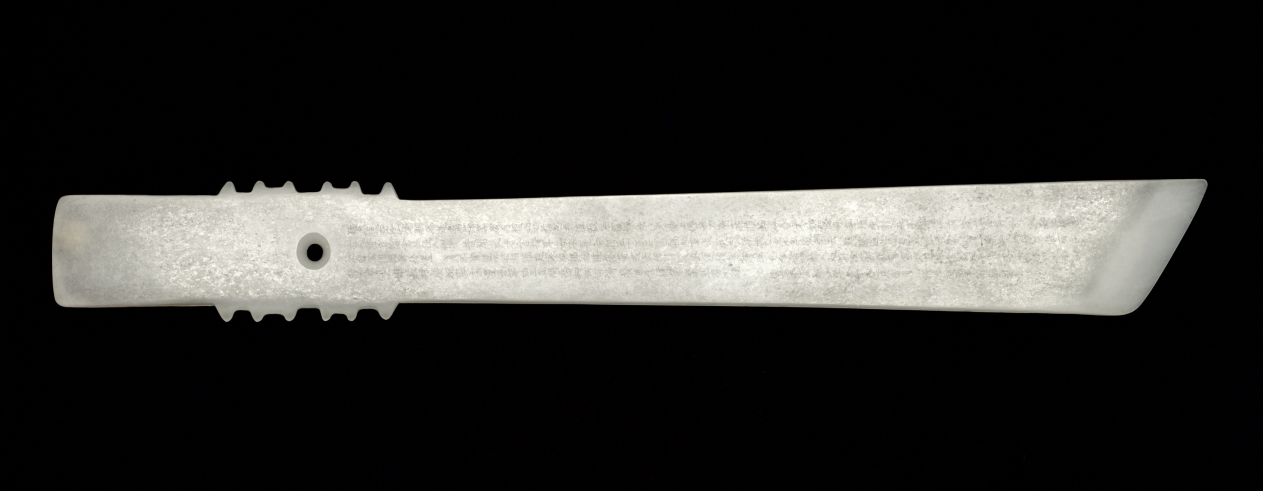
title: Scepter (Gui) with Miscellaneous Poems by Tao Qian (365–427 CE)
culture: China, Possibly Qing dynasty (1644-1911), Qianlong period (1736-1795)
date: 1122 or later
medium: translucent white jade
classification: Jade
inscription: "Respectfully made by the jade works of the palace work bureau, on an auspicious day in the twelfth month of the winter, in the third year of Xuanhe of the Imperial Song (Dynasty)" (1121). On the front and back of the knife are engraved, in minute characters with double contour lines, eight complete poems entitled "Miscellaneous Thoughts" by Tao Yuanming (365–427 CE), one of the greatest early poets of China. Here are two examples: The bright sun sinks beyond the western ridge,/ The white moon rises behind the eastern range./ Afar, afar a myriad miles it flashes,/ Immeasurably vast its light amidst the sky./ A wind comes and enters the bedroom door,/ So in the night pillow-and mat are cold./ The air seems different- - I awake to the season's change./ I cannot go to sleep and know the night's eternity,/ I wish to speak but there is no friend to talk to./ Raising my cup I challenge my lonely shadow./ The days and months fling us aside and pass;/ We have high purposes but cannot realize them./ Thinking of this I have grief and pain at heart,/ And all night long can find no quietness./ It is hard to dwell long in prosperity;/ Rise and decline cannot be reckoned on./ What were formerly lotus buds in May,/ Now in the autumn are but withered seed-pods./ A heavy frost stiffens the prairie grasses- - / They wilt despondently and do not quickly die.-/ The sun and moon come ever circling back./ Once we depart we do not shine again./ I ponder deeply on times long past and gone/ Though to remember them tears my very entrails.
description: This piece derives its shape from the ancient jade scepter known as gui. On both sides of the jade surfaces are the inscribed texts "Miscellaneous Five-Character Poems by the Jin Poet Tao Qian" engraved in minuscule characters, with a reference indicating that the piece was made by the jade workshop of the Xiuneisi Office in 1122 of the Xuanhe reign. This Northern Song attribution is, nevertheless, questionable.